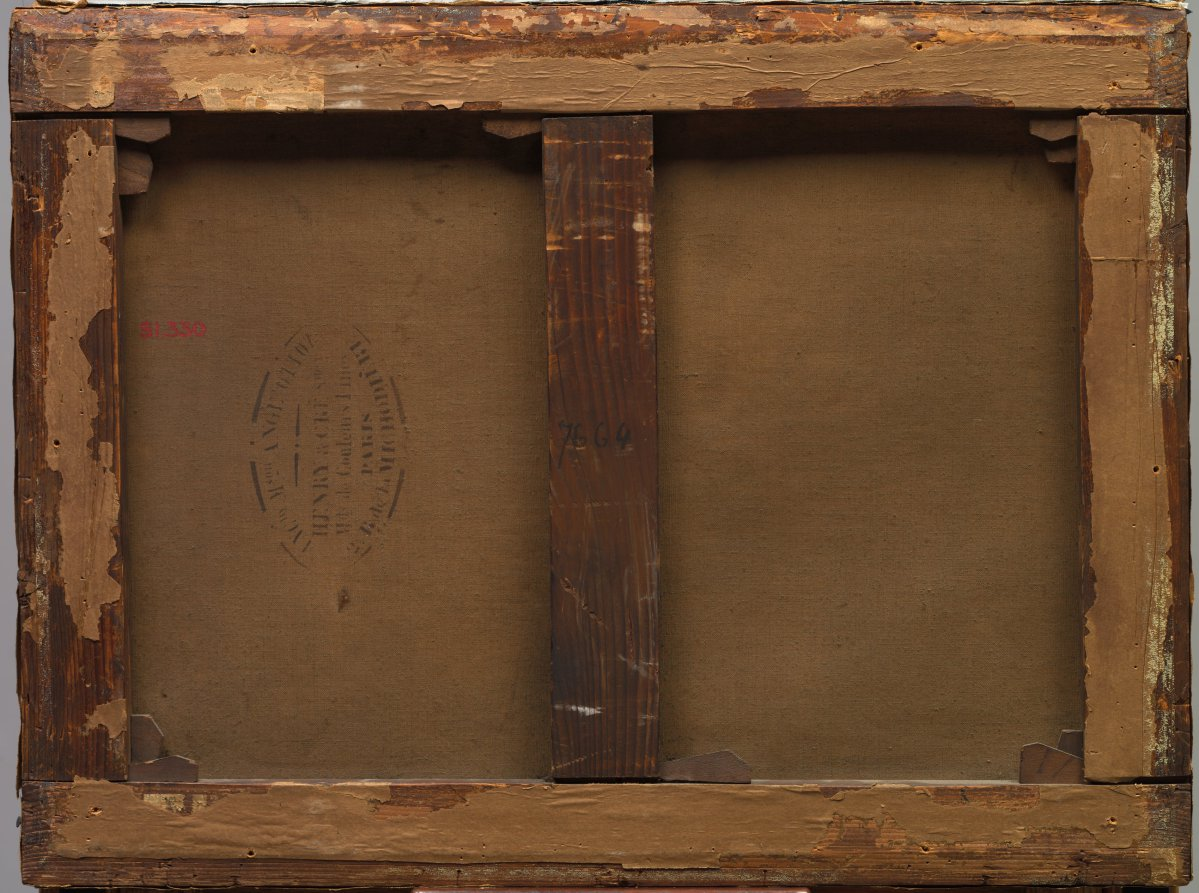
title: The Pond at the Entrance of the Woods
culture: France, 19th century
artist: Jean Baptiste Camille Corot (French, 1796–1875)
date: c. 1860–75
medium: oil on fabric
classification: Painting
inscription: Signed lower left in dark brown paint: corot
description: This scene of a pond bordered by large, leafy trees echoes Corot's well-known views of Ville-d'Avray, while the vaporous light and atmospheric effects within a restricted palette resemble those of the artist's late style of the 1860s and 1870s. The small forms of the peasant and white goat are also typical of Corot's late imagery. This is one of many views of a large pond at Ville-d'Avray, a small commune on the western suburbs of Paris, where Corot inherited a rural property from his parents.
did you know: This painting's first recorded owner was the Dowager Duchess of Newcastle, née Henrietta-Adela Hope, who became a widow of the sixth duke Henry Pelham Alexander in 1879.